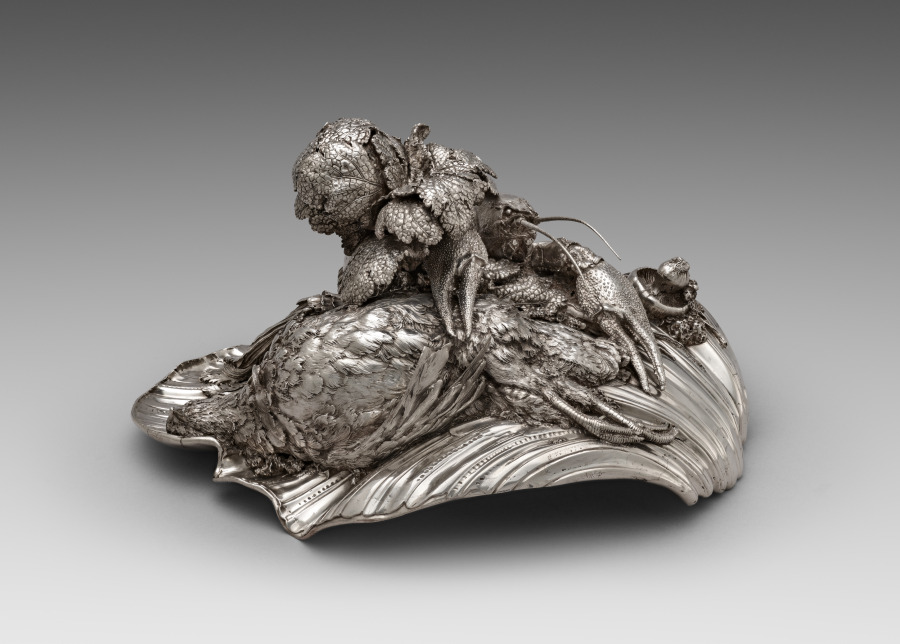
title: Cover for a Tureen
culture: France, Paris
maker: Henry Adnet (French, 1745)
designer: Juste-Aurèle Meissonnier (French, 1695–1750)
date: 1735–38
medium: silver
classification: Silver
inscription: engraved Meissonnier signature.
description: See entry for cover record 1977.182.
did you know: The langoustine, pigeon, and vegetables were cast using real examples giving the silver copies lifelike detail and appearance.